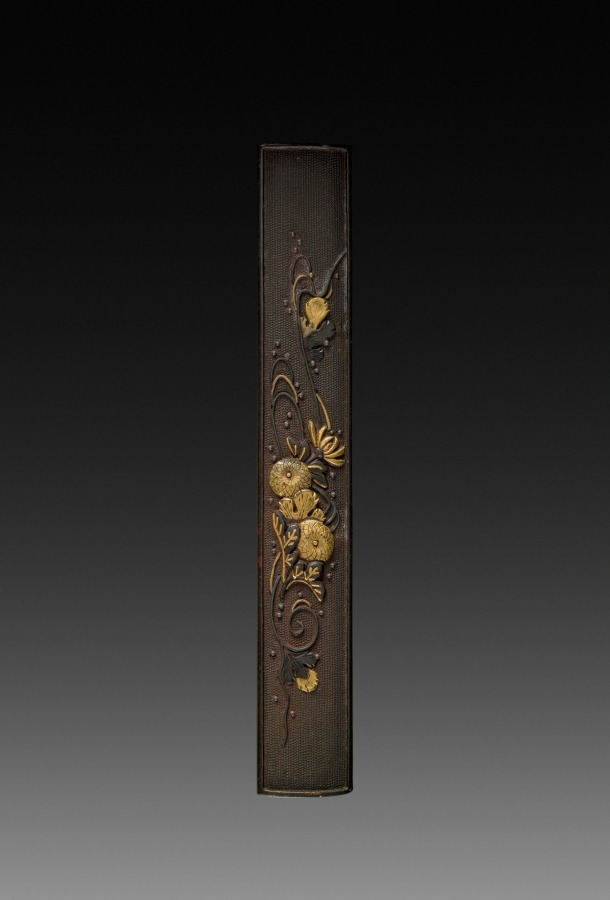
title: Knife Handle (Kozuka)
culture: Japan, Edo period (1615–1868)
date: early to mid-1800s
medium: inlaid bronze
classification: Metalwork